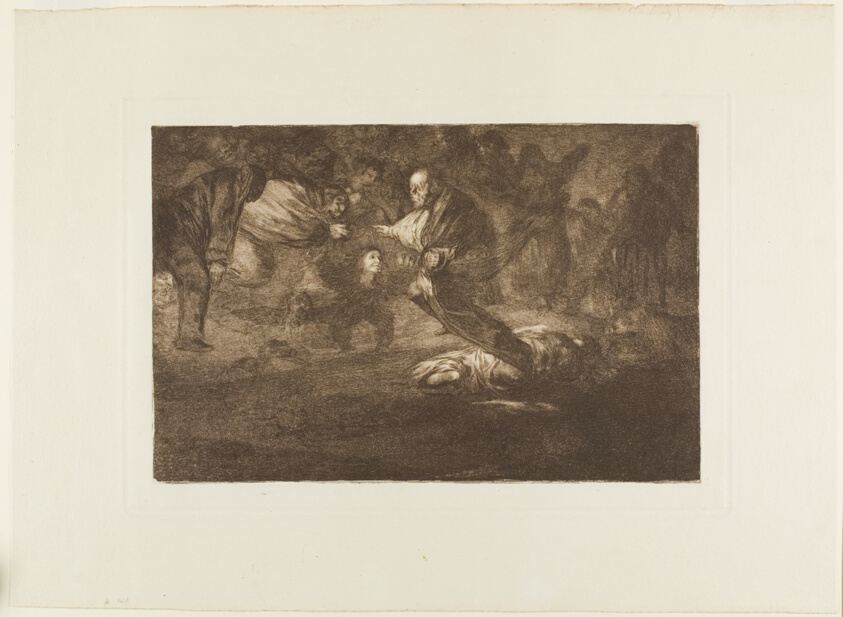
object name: Print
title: God creates them and they join up together, plate 18 from Los Proverbios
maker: Francisco José de Goya y Lucientes (Spanish, 1746-1828)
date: 1815/24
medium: Etching, burnished aquatint and burin printed in sepia ink on ivory wove paper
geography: Spain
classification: etching; print; prints and drawing